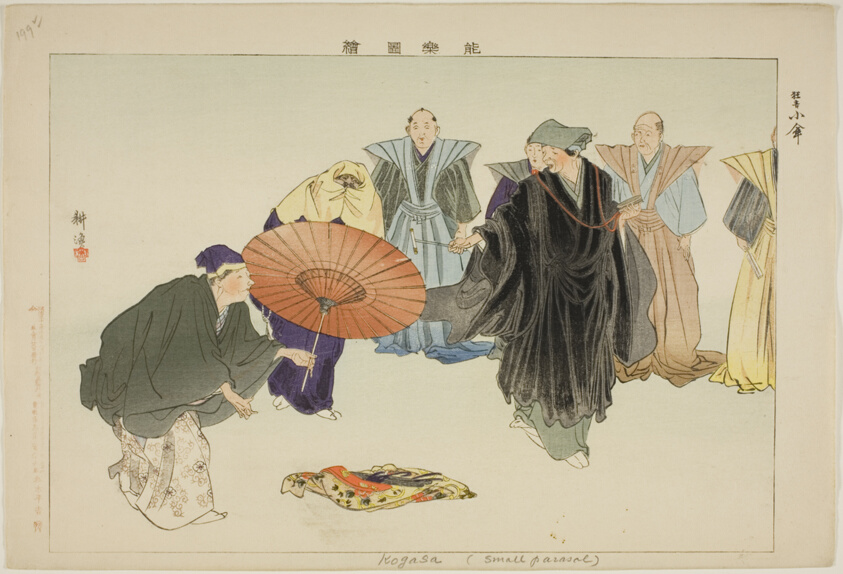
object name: Print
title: Kogasa, from the series "Pictures of No Performances (Nogaku Zue)"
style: Japanese (culture or style)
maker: Tsukioka Kogyo; Japanese, 1869-1927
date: 1898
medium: Color woodblock print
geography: Japan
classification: woodblock print; print; asian art